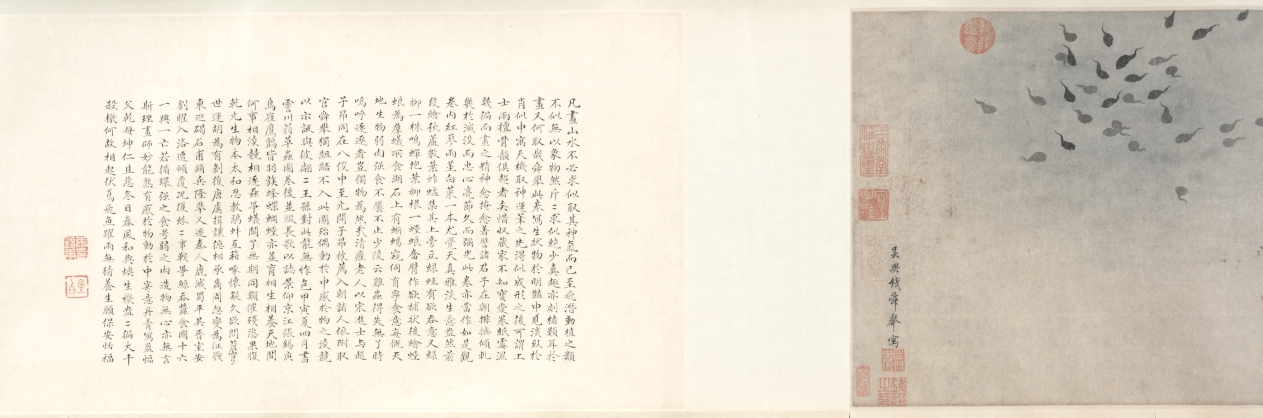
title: Insects and Flowers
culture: China, Qing dynasty (1644-1911) or Republican period (1912-49)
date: c. 1900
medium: Handscroll, ink and color on paper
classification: Painting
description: More than 26 feet long, this scroll presents insects, reptiles, and plants in delicate brushwork and pale colors, referring in style to earlier Southern Song dynasty (1127–1279) bird-and-flower paintings. Upon closer inspection, ants dismember a butterfly and reptiles wait to ambush their prey. An inscription at the end of the painting gives us an idea of its meaning: Attributed to the Qing dynasty scholar Zhang Xigeng (張錫庚, 1801–1861), the inscriber relates the work to an earlier painting by Qian Xuan (錢選, c. 1235–before 1307) and further suggests that the painting may allude to the relentlessness of natural selection. By drawing a parallel to tumultuous episodes in Chinese history, the writer might even hint at the domestic rebellions and the aggression of Western powers against China in his lifetime, particularly the Opium Wars (1839–60).